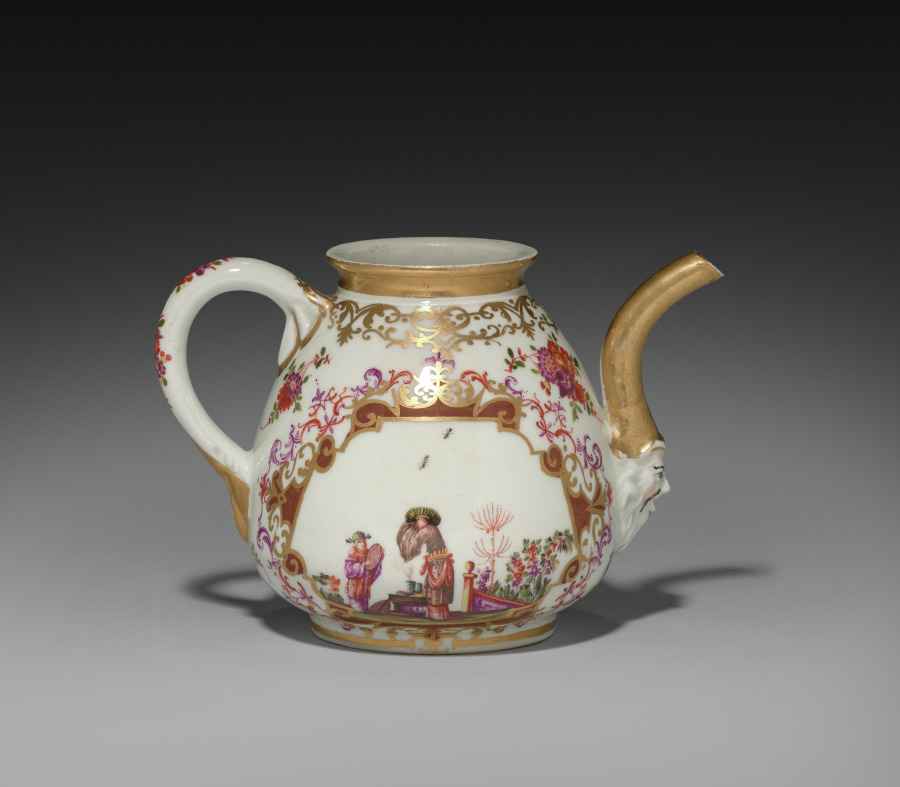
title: Tea Pot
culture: Germany, Meissen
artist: Meissen Porcelain Factory (German, est. c. 1710)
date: c. 1723–24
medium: gilt porcelain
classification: Ceramic